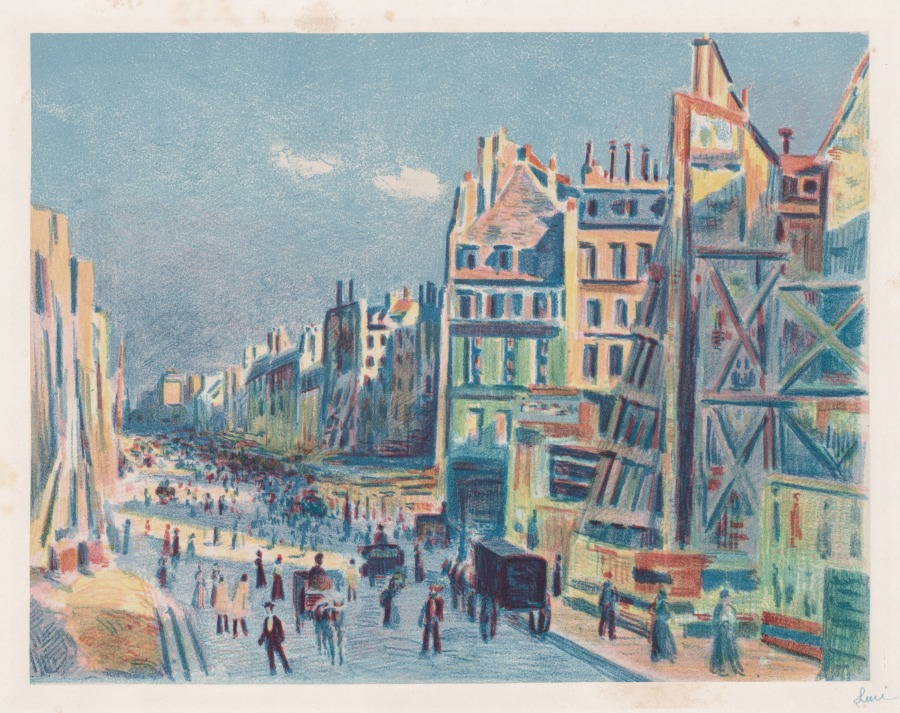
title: Rue Reamur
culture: France, 19th-20th century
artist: Maximilien Luce (French, 1858–1941)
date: 1896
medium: lithograph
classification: Print